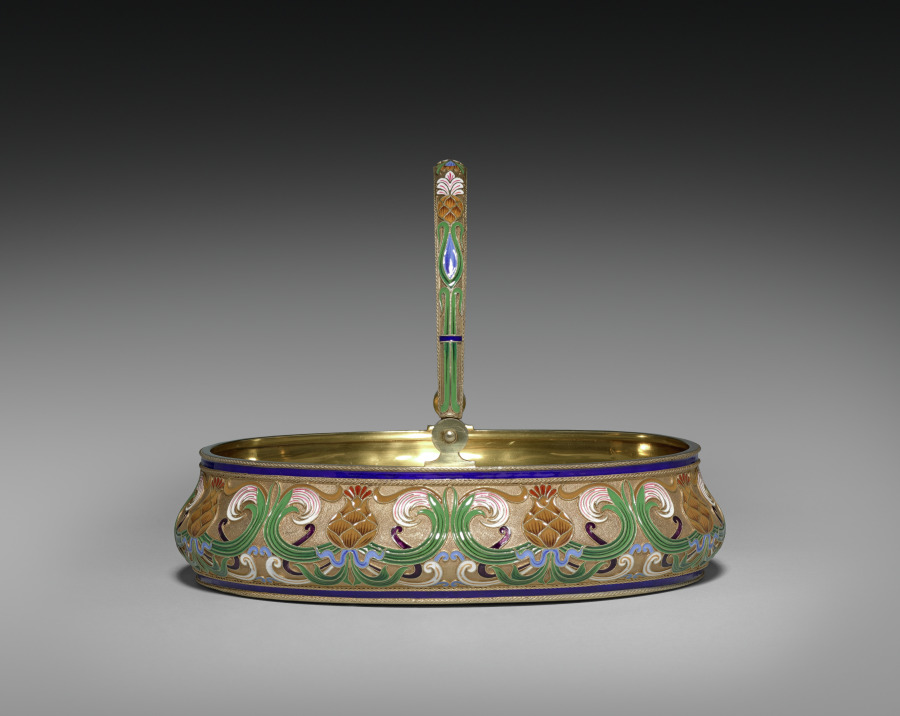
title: Cake Basket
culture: Russia, St. Petersburg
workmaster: attributed to Feodor Ivanovich Rückert (Russian, 1840–1917)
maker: House of Fabergé (Russian, 1842–1918)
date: 1887–96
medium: silver gilt, opaque cloisonné enamel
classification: Miscellaneous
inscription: 88, St. George [assay mark for Moscow, 1882-1896]; C. Fabergé (in Cyrillic); double-headed eagle [imperial warrant]; 10593 scratched.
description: Fabergé’s craftsmen in Moscow, especially under the watchful eye of workmaster Feodor Rückert, became known for their work in the Pan-Slavic or Neo-Russian style, hearkening back to 17th-century motifs of Russian folk art. Often on rather conventional shapes, Rückert and his silversmiths created an explosion of color, achieved through the historic technique of cloisonné enamel in which tiny metal lines are soldered to the surface then filled with glass powders in various colors and fired to create a high gloss finish. The result is a spectacular evocation of the 17th-century originals. Far from mere copies, however, Rückert's designs, such as this tea service, employ naturalistic or abstract motifs in a thoroughly modern adaptation of a remarkable earlier period of Russian art and decoration.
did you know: This cake basket is part of a larger tea service.